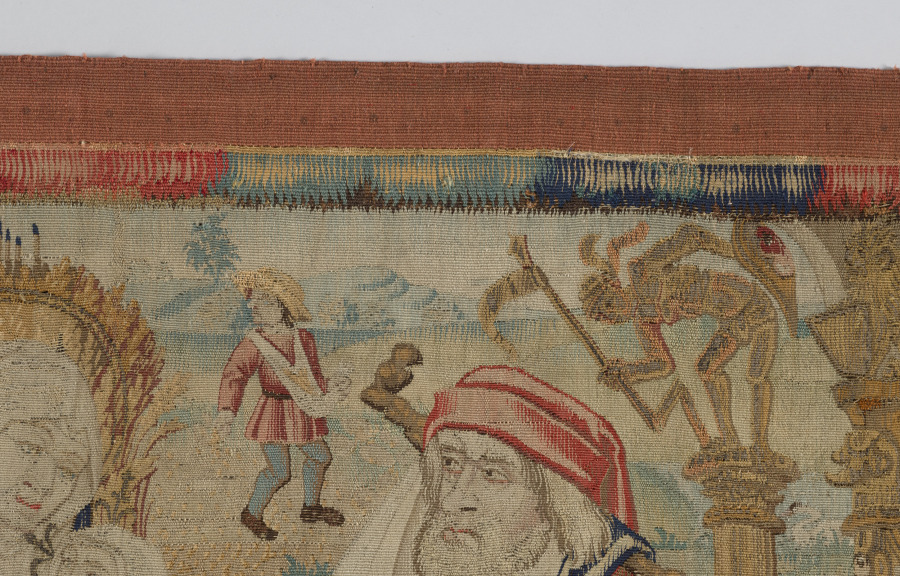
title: Altar Frontal: Scenes from the Childhood of Christ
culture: France and South Netherlands, 1500s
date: c. 1500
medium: Wool, silk, gold thread; tapestry weave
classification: Tapestry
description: Pictorial tapestries were symbols of wealth and more highly prized than paintings. Small tapestries with Christian imagery were frequently commissioned to embellish the fronts of altars. This example displays the Massacre of the Innocents, the Flight into Egypt, and Christ among the Doctors. Tapestry weave is ideal for creating narrative scenes. The technique can be compared to painting, as each colored weft (horizontal thread) is interlaced with warps (vertical thread) where needed for the pattern. As expensive investments, tapestries have the advantage of being portable and easily stored and displayed.